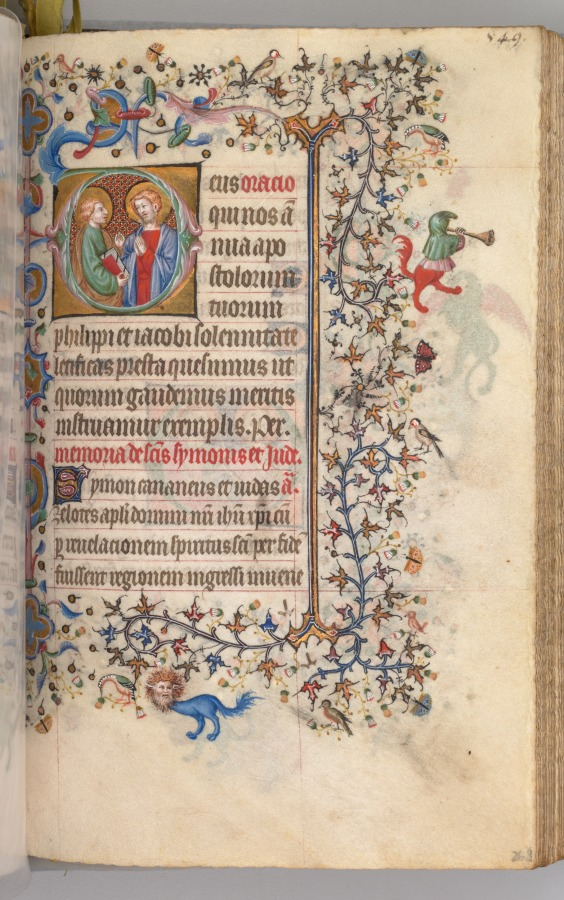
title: Hours of Charles the Noble, King of Navarre (1361-1425): fol. 269r, SS. Philip and James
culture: France, Paris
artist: Master of the Brussels Initials and Associates (French)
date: c. 1405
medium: ink, tempera, and gold on vellum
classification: Bound Volume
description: This precious volume was obviously highly prized by its owner, the French-born King of Navarre, who had his coat of arms painted on no less than twenty folios. Rather than directly commissioning this manuscript from a specific workshop, it seems that Charles the Noble acquired his book of hours -- perhaps ready-made for the luxury market -- while on a trip to Paris in 1404-05. A collaborative effort, six painting styles are evidenced within the pages of this codex, those of two Italians, two Frenchmen, and two Netherlanders. The painter who was responsible for the planning and decoration of the book, and who produced seventeen of the large miniatures, was a Bolognese artist known as the Master of the Brussels Initials. His principal assistant, responsible for most of the borders, was a Florentine who signed his name "Zecho" da Firenze on folio 208 verso.